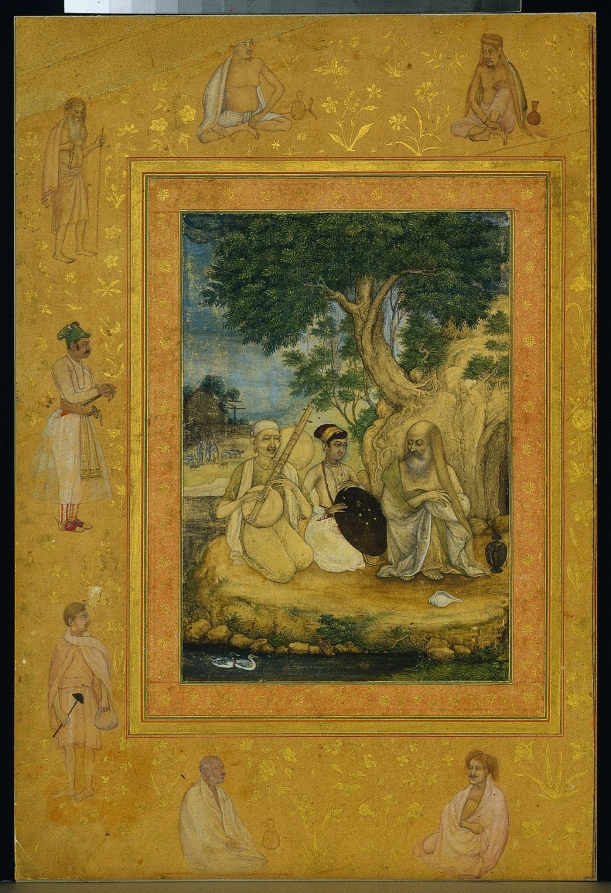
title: Prince and ascetics, from the Late Shah Jahan Album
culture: India, Mughal court, reign of Shah Jahan (1628-1658), Mughal Dynasty (1526-1756)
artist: attributed to Govardhan (Indian, active c.1596–1645)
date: c. 1630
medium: Gum tempera, ink, and gold on paper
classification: Painting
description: Most paintings in the Late Shah Jahan Album were commissioned specifically for the album, but some older finished works were chosen to be incorporated; they were removed from their original housings and inserted into the new borders. This painting of a Mughal prince visiting a Sufi holy man in his cave dwelling is one example, chosen probably because it underscores the importance of the religious dimension of Mughal life. The conch on the ground before the ascetic is blown at the beginning of prayer, which in the Sufi tradition is often sung to the accompaniment of music. The pair of ducks in the foreground imply the harmonious union of the spiritual and temporal in the Mughal realm. Mendicant Islamic ascetics fill the borders on this page, except for the one noble retainer standing by the prince.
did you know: The holy man sits under a tree, an ancient Indian place of honor.